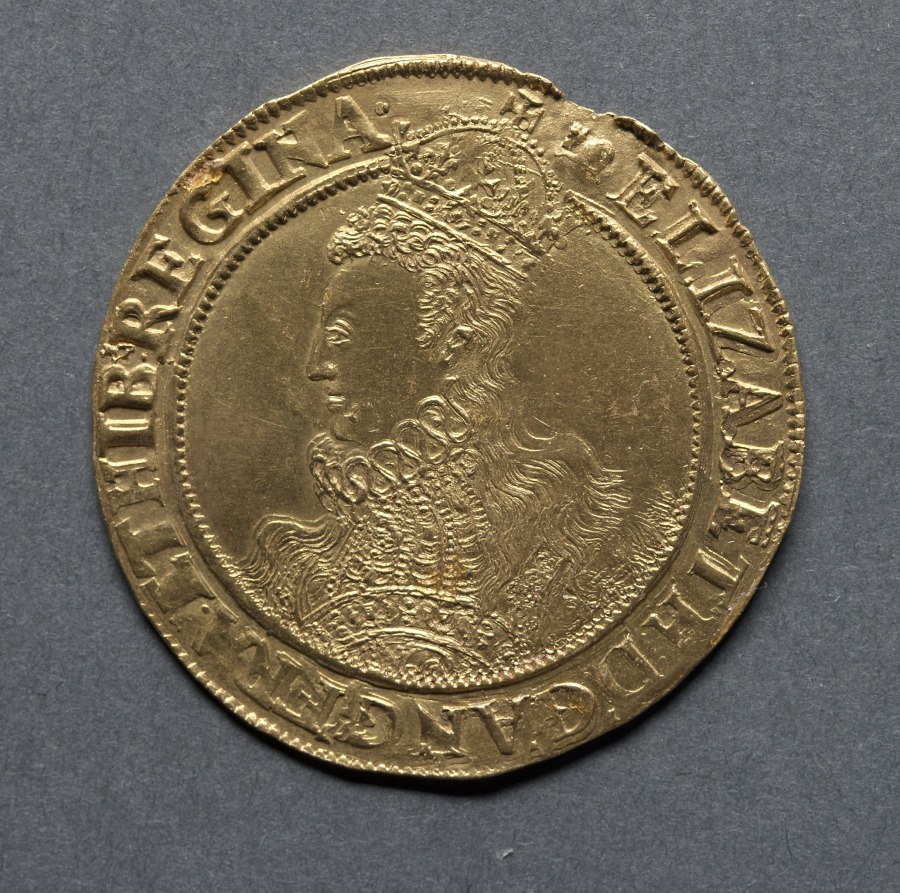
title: Pound: Elizabeth I (obverse); Crowned Shield of Arms (reverse)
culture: England, Elizabeth I, 1558-1603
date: 1595–98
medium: gold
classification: Coins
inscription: ELIZABETH D G ANG FRA ET HIB REGINA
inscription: SCVTVM FIDEI PROTEGET EAM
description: For a long time all Elizabethan gold was considered as one series, but now it is divided into three, in accordance with who was in charge of the Tower mint and in accordance with the sequence of initial marks. On the reverse the initial mark is a key and can be seen just before the start of the inscription. On the obverse is a woolpack although it is overstruck. This points to the reuse of the die.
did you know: Queen Elizabeth still appears youthful in this portrait; she wears an elaborate bejeweled dress and her long hair flows from underneath her crown.